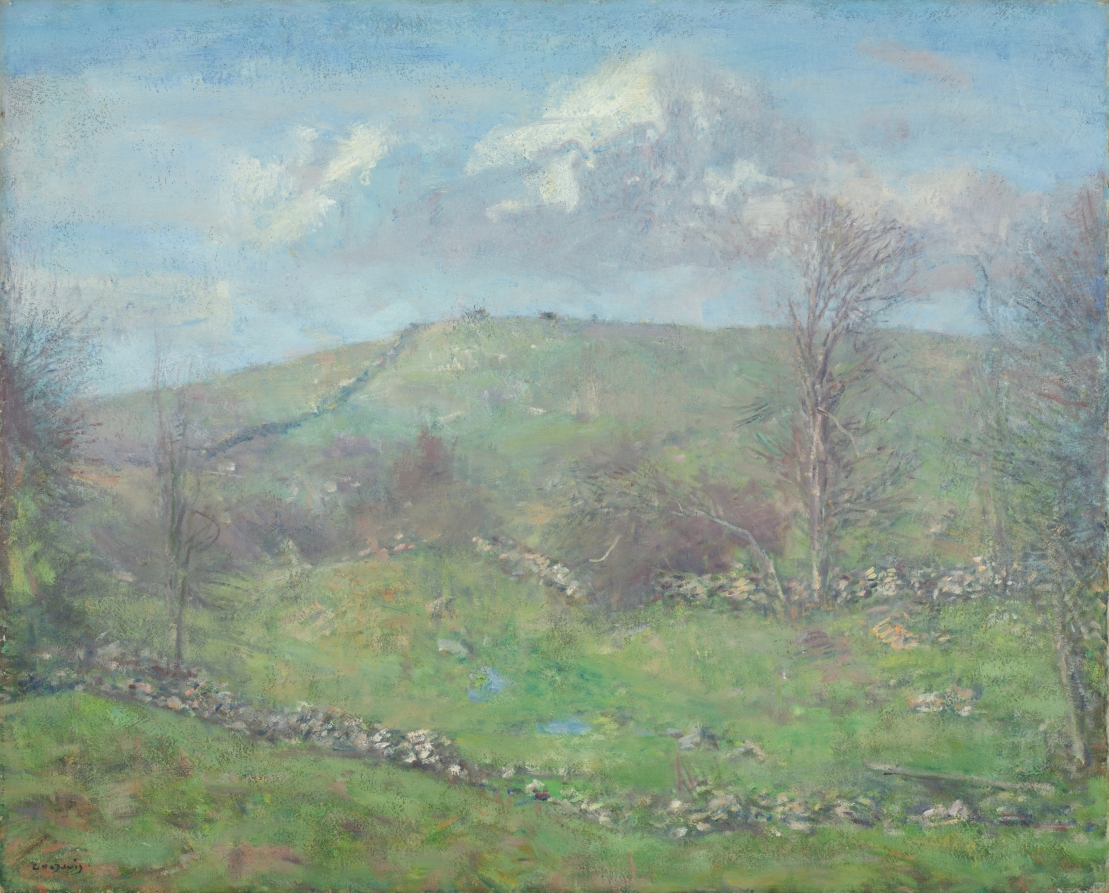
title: Spring on the Hillside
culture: America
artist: Charles Harold Davis (American, 1856–1933)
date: c. 1920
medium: oil on canvas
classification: Painting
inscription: Signed lower left: "C.H. DAVIS"